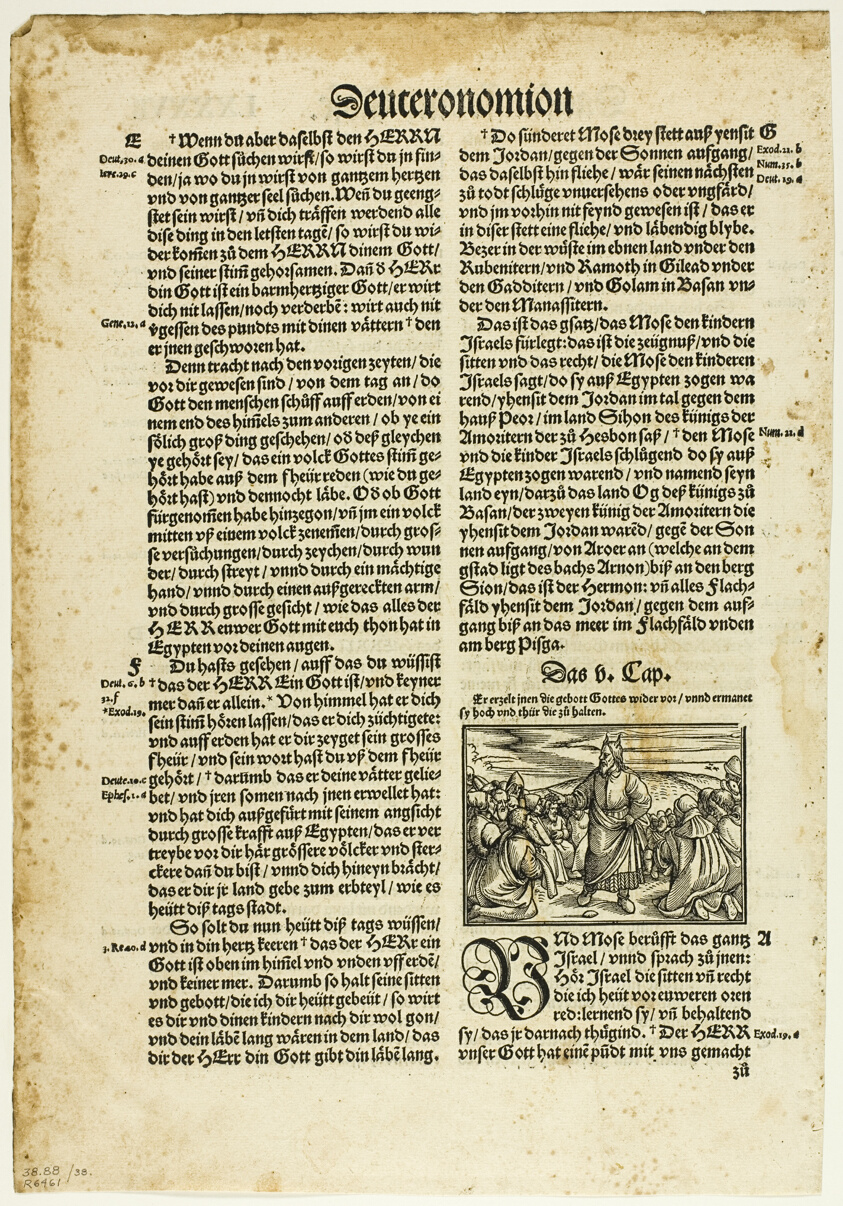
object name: Print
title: Illustration from a German Bible, plate 38 from Woodcuts from Books of the XVI Century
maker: Hans Holbein, the Younger, after (German, c.1497-1543); assembled by Max Geisberg (Swiss, 1875-1943)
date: 1534, assembled into portfolio 1937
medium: Woodcut on paper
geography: Germany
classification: woodcut; print; prints and drawing